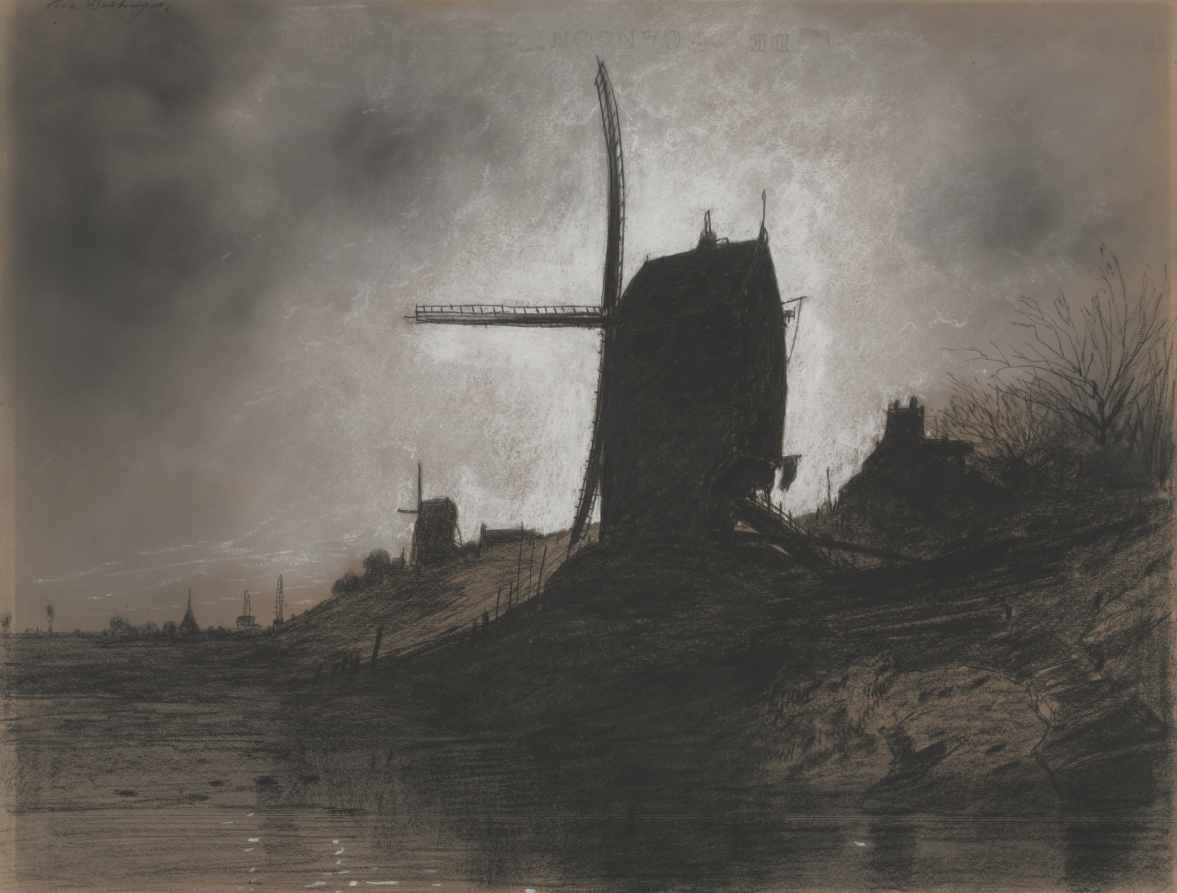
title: Windmills in a Landscape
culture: France, 19th century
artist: Eugene Deshayes (French, 1828–1890)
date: c. 1850–90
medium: charcoal with white heightening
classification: Drawing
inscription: inscribed in black chalk, upper left : "Eug. Deshayes"